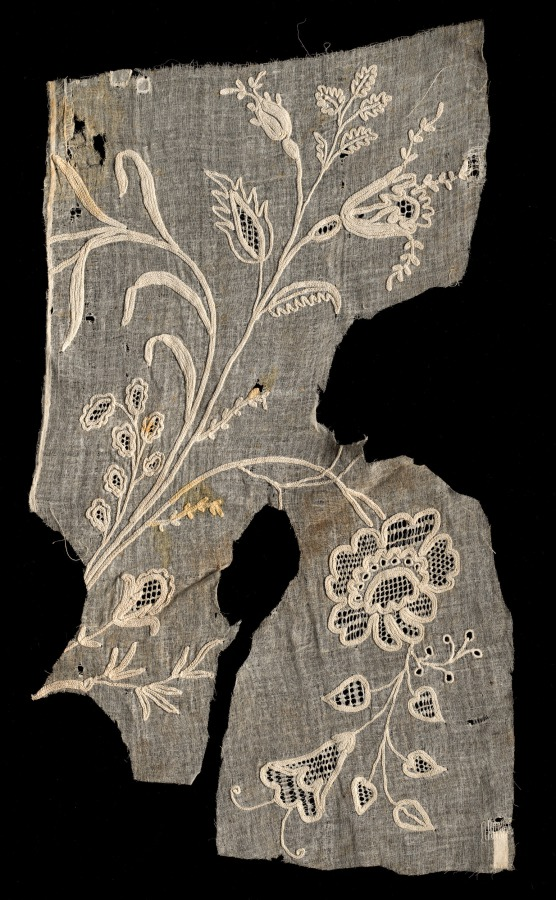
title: Lace Fragment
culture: Spain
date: 1700s–1800s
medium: Plain weave cotton: lace (drawnwork) and chain stitch embroidery (tambour work)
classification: Embroidery